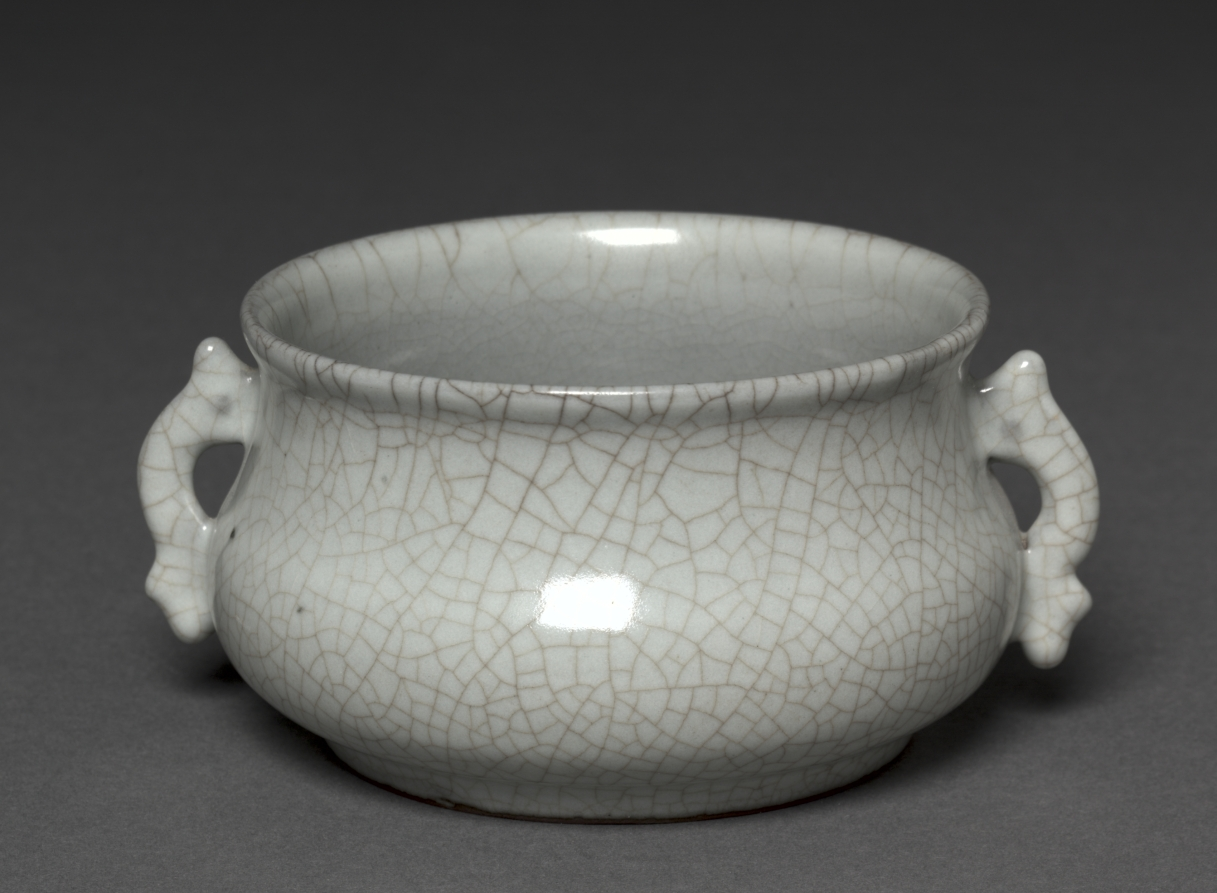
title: Incense Burner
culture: China, Zhejiang province, Hangzhou, Southern Song dynasty (1127-1279)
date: 1200s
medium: porcelaneous stoneware, Guan ware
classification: Ceramic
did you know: There are six spur marks on the incense burner's glazed base.